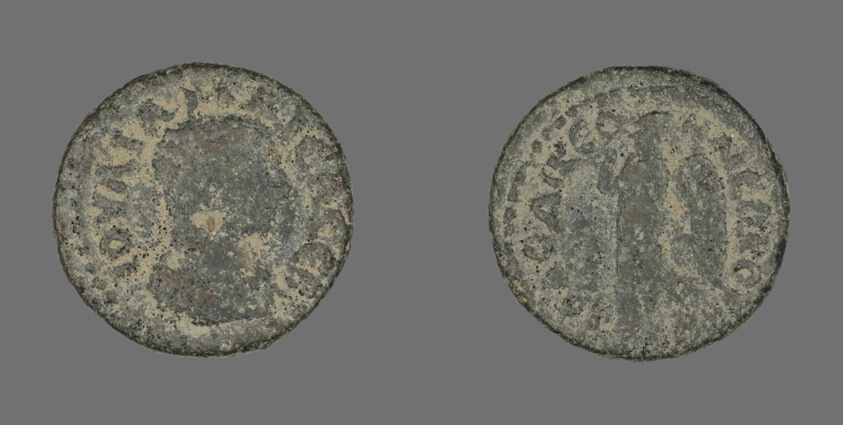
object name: Coin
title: Coin Portraying Julia Maesa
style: roman (ancient, style or period)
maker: Roman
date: 165-224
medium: Bronze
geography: Roman Empire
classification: coin; ancient art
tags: portrait, female